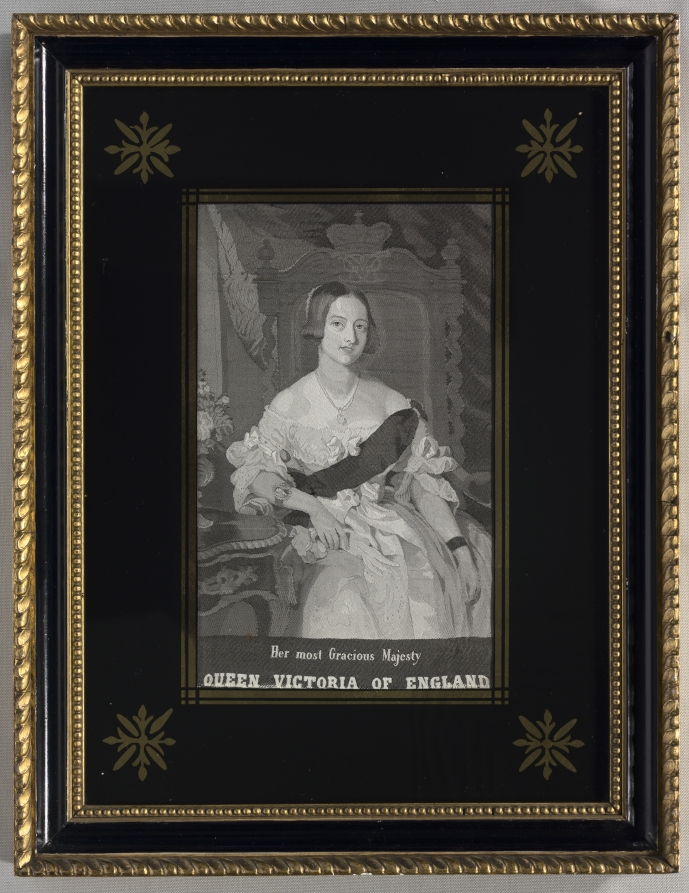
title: Queen Victoria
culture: England (?), early 20th century (?)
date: c. 1900–1925(?)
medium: jacquard weave; silk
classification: Textile